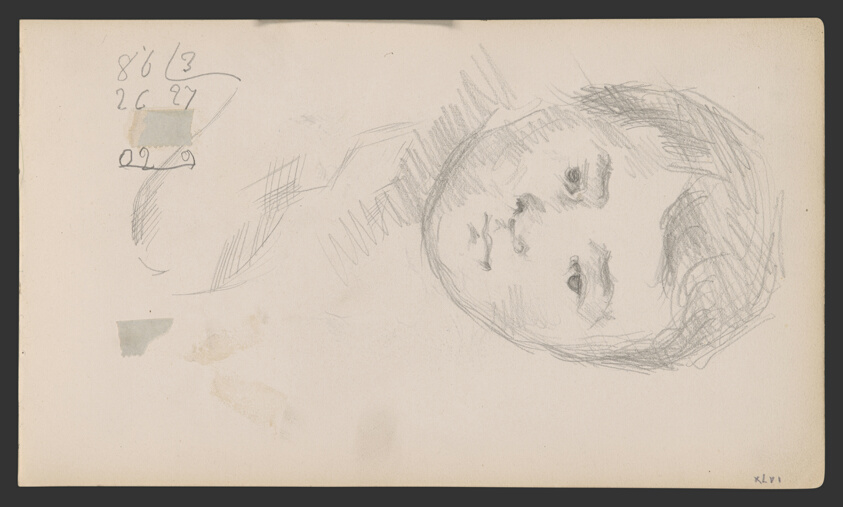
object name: Drawing and Watercolor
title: Sketchbook No. 2 (L'Estaque)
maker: Paul Cézanne; French, 1839-1906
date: 1875–86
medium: Graphite and pen and ink drawings on paper, bound into a book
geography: France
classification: sketchbook; graphite; prints and drawing; paper